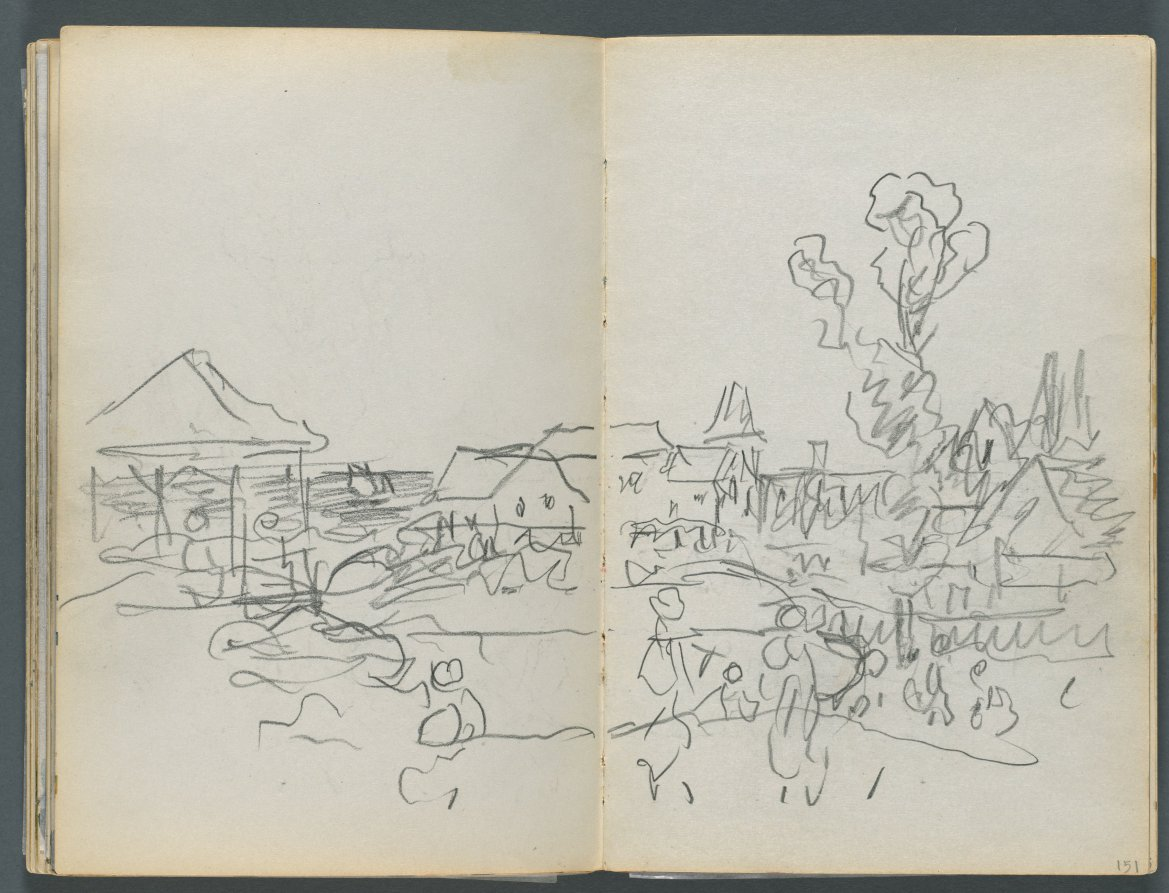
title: Sketchbook, The Dells, N° 127, page 150 &151: Coastal View with Houses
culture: America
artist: Maurice Prendergast (American, born Newfoundland [now Canada], 1858–1924)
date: c. 1919–1921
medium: graphite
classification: Bound Volume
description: This sketchbook contains 59 pages of graphite drawings and 16 watercolors made at various locations on Cape Ann, Massachusetts.